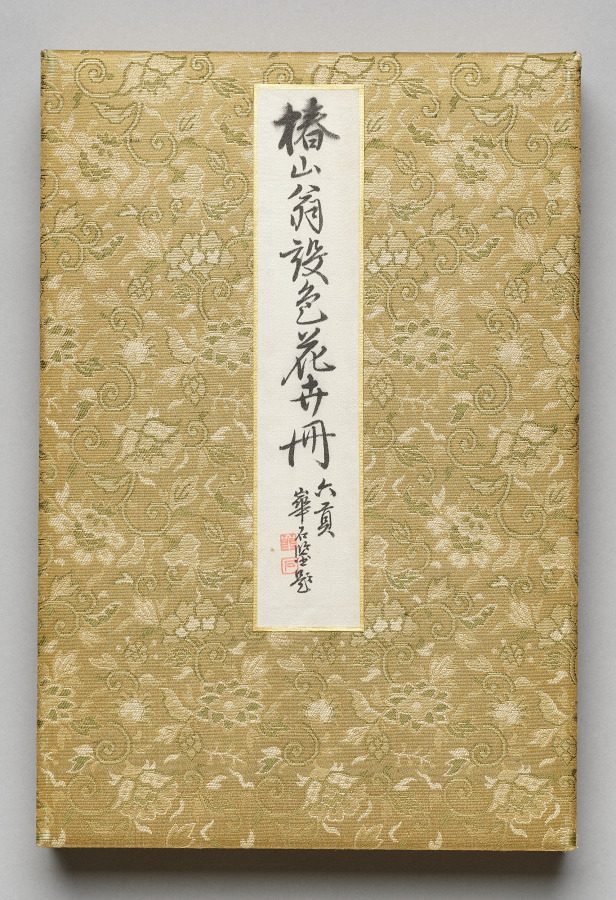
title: Flowers and Grasses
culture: Japan, Edo period (1615–1868)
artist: Tsubaki Chinzan (Japanese, 1801–1854)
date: 1841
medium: folding-album with six leaves of paintings; preface in ink on paper; paintings in ink and color on silk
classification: Bound Volume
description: This album contains six small paintings, each of which takes a different plant as its subject. The paintings include depictions of pomegranates, as well as flowering narcissus and orchid.